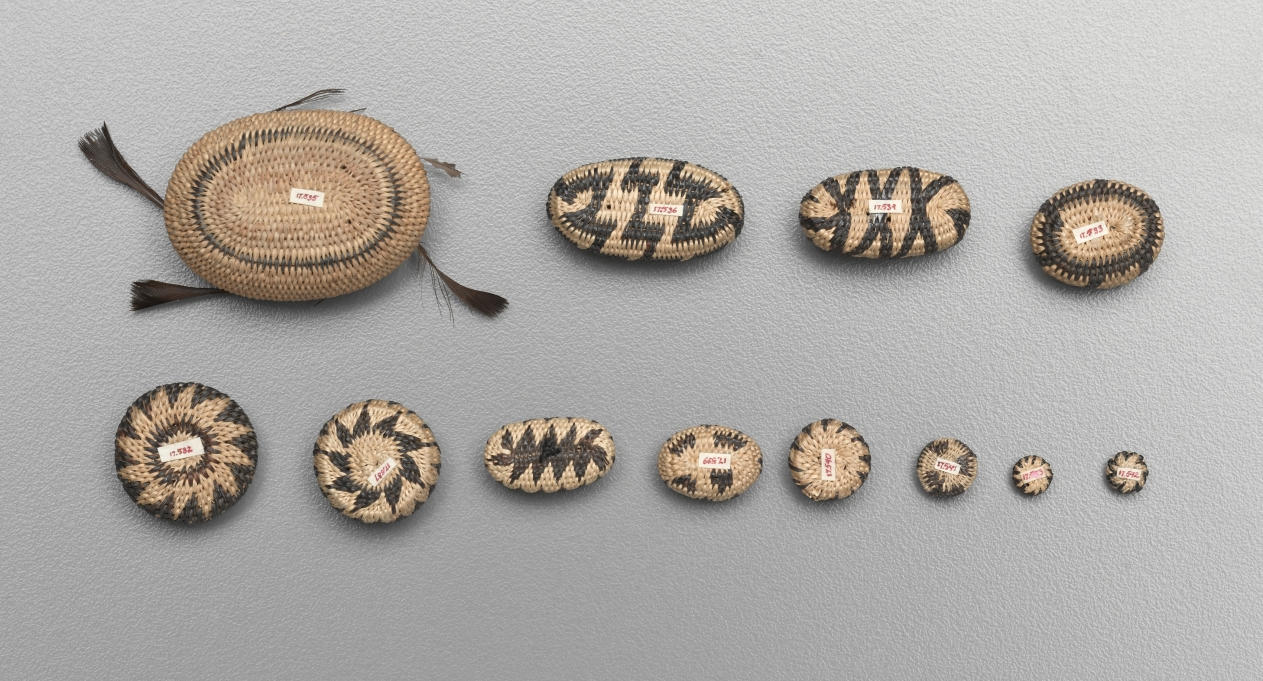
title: Miniature Round Basket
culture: California, Pomo, late 19th-early 20th century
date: late 1800s-early 1900s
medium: plant materials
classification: Basketry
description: Miniature baskets were made to demonstrate the basket-maker’s virtuoso skill, and these tiny marvels seem to be no exception—the smallest are only five millimeters wide but still patterned. For such fine work, dexterity was required as much for preparation of materials as for weaving.